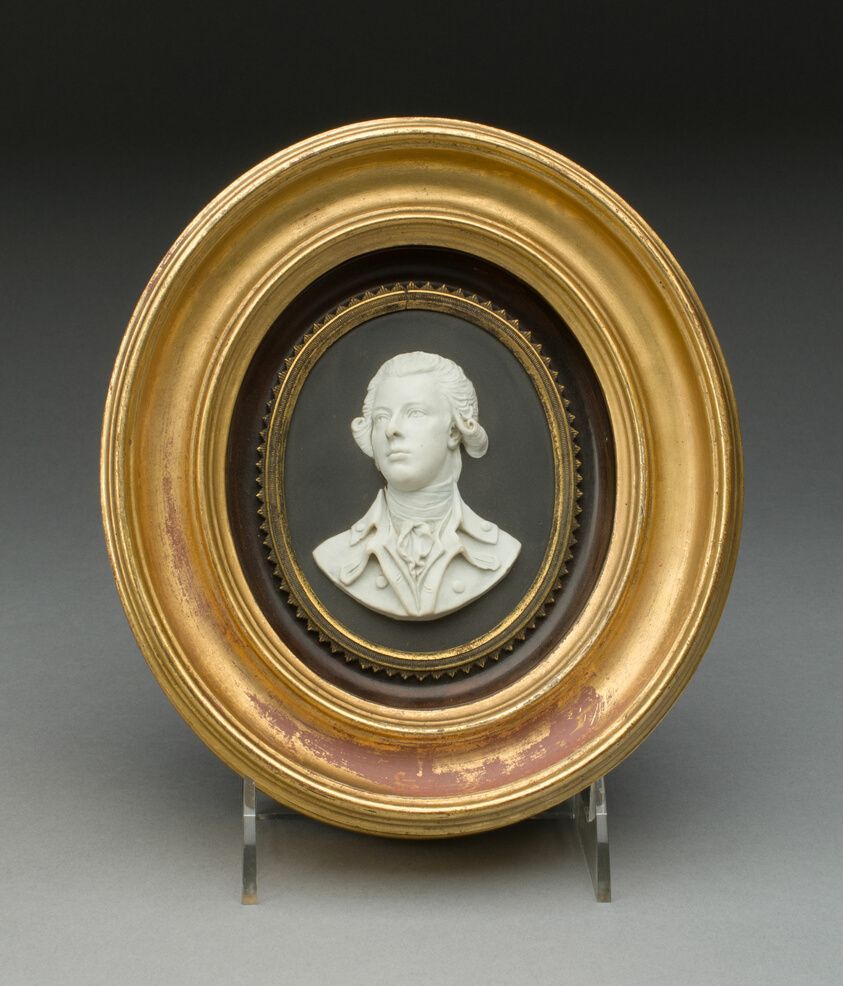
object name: Ceramics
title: Plaque: Portrait of William Pitt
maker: Wedgwood Manufactory (England, founded 1759)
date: c. 1805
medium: Stoneware (jasperware)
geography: Burslem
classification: sculpture; stoneware; european decorative arts; ceramics